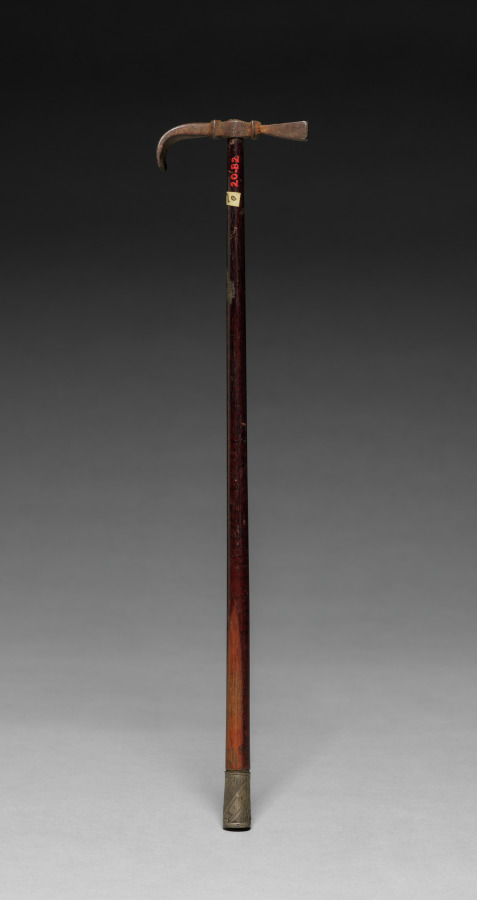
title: Jeweler's Hammer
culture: Europe, 17th century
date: 1600s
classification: Tool